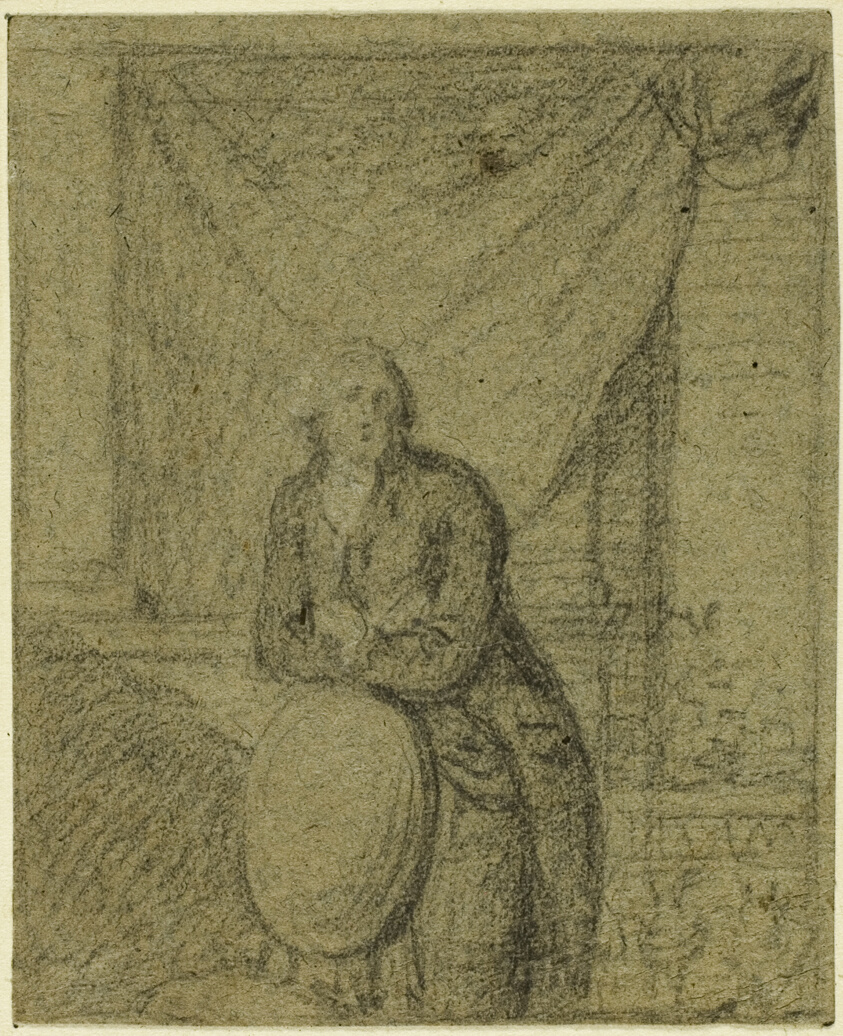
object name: Drawing and Watercolor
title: Portrait of a Man Standing in Front of Window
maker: Benjamin West (American, 1738-1820)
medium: Black chalk heightened with traces of white chalk, on gray laid paper, perimeter mounted to cream wove card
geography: United States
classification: chalk; drawings (visual works); prints and drawing